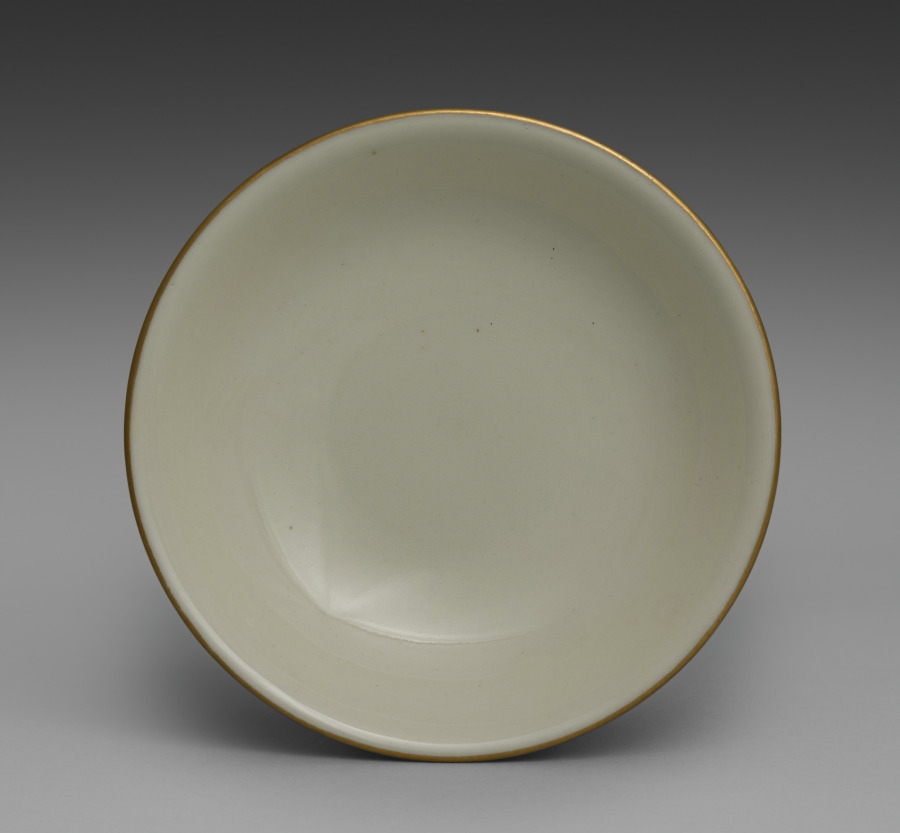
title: Cover for a Bowl from Dining Set with Plum Blossoms and Cracked-Ice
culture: Japan, Meiji period (1868–1912)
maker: Seifū Yohei II (Japanese, 1844–1878)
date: c. 1875–78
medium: Porcelain with molded designs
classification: Ceramic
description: Each item in this set has a delicate low-relief design of flowering plum branches over scattered, intersecting lines meant to resemble the cracked-ice surface of a frozen body of water and is signed on the base in gold pigment. While Yohei II produced many fine works in underglaze blue, like those produced by Kiyomizu Shichibei, he also made works in quite different styles later in his career, from the early 1870 s. In 1873, he was appointed purveyor to the Industrial Center of Kyoto Prefecture, a designation associated with Kyoto’s efforts to reach an international market through the port of Kobe; and from 1875 until his death, he was involved in national-level projects to present Japanese ceramics across the world. It was during this period that Yohei III was apprenticed to Yohei II, and it has been suggested that this set may in fact be an early example of Yohei III’s work, which he signed with his teacher’s name. Decorated with flowers resembling Japanese textile motifs, the set calls to mind the design of Yohei II’s pair of vases with plum blossoms in the Victoria and Albert Museum. Here, the elaborate trees created for a formal public exhibition setting have been translated into the approachable blossoms of the genteel domestic environment. While the designs are consistent across the pieces, each raised flower petal and pistil and each incised line in the ice was done by hand, so the cups, bowls, and dishes are similar yet unique. The bottoms of two boxes once identified the set’s owner, but the information has been deliberately obscured with black ink. However, inscriptions still visible appear to indicate two occasions, once at the end of July 1886 , and once again in June 1916 , when parts of the set were requested from Hokura in Niigata Prefecture. The location corresponds to a neighborhood in the present-day city of Jōetsu. The surname Tsuji 辻 also appears on a paper tag affixed to one of the box cloths. Future research may possibly reveal more about their provenance. A vase by Yohei III in a private collection combines the formal grandeur of the Yohei II vases in the Victoria and Albert Museum with the gentler design of this dining set, placing flowering plum trees against soft, scalloped-edge clouds resembling those in golden screens.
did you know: The dining wares have a creamy white coloration that the four boxes containing them identify as Korean in style.